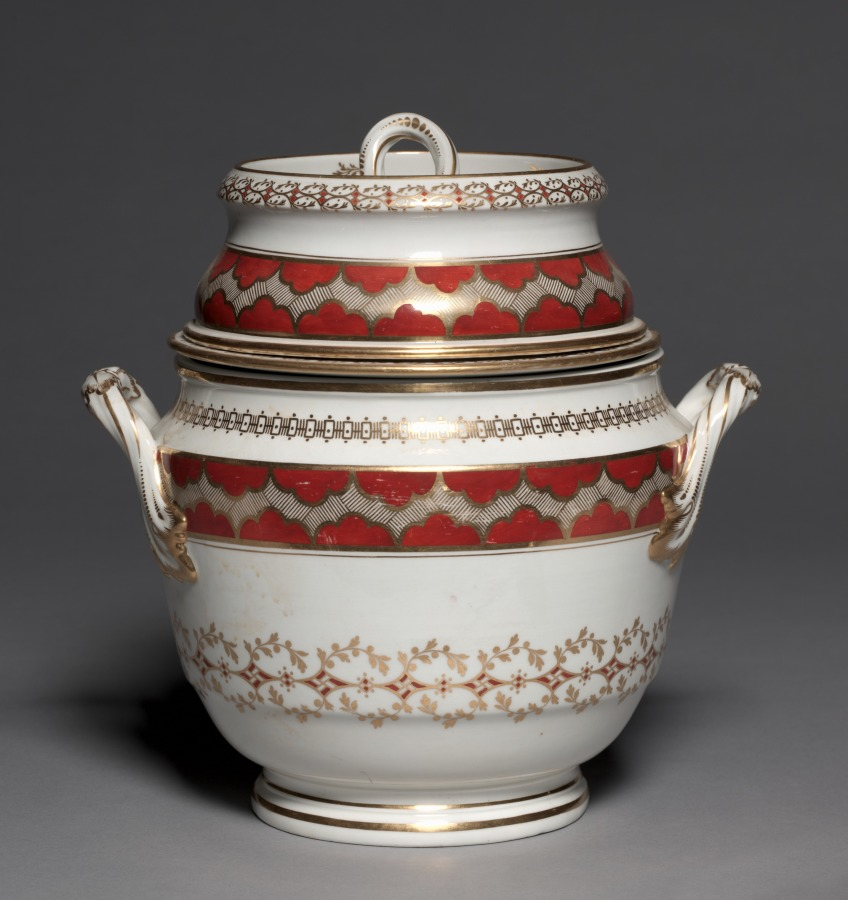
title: Pair of Ice Pails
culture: England, late 18th-early 19th Century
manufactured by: Flight & Barr (British)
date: 1793–1807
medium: porcelain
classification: Ceramic